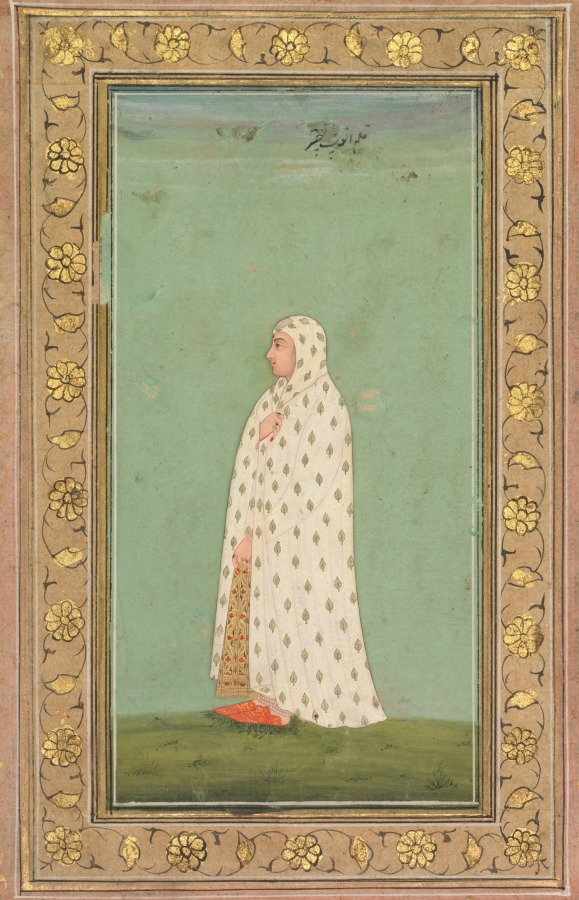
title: Portrait of a Woman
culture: Northwestern India, Rajasthan, Rajput Kingdom of Bikaner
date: c 1675–1700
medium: Gum tempera, ink, and gold on paper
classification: Painting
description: The royal court at Bikaner included Muslim women. This royal woman wears a white cloak covered with a repeating gilded leaf pattern and a screen sewn in at the forehead. When the cloak is pulled over her face for added modesty, she looks out through the screen.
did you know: She stands on a cluster of leafy vegetation.